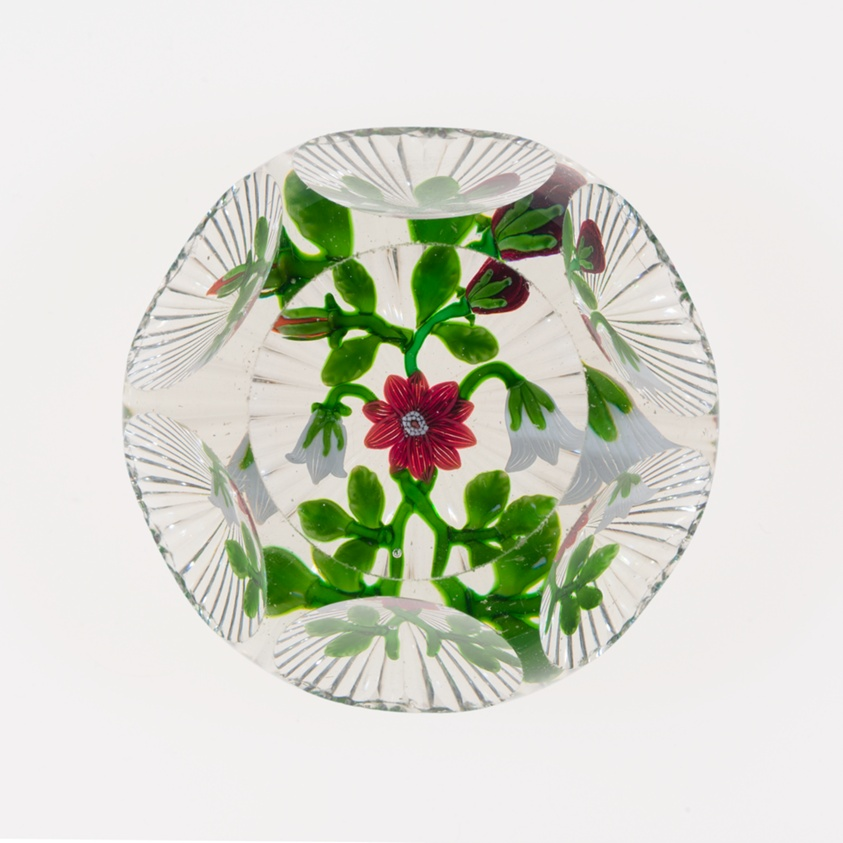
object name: Glass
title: Paperweight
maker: Baccarat Glassworks (Cristalleries de Baccarat); Lorraine, France, founded 1764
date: c. 1845–60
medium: Glass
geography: Baccarat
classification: paperweight; glass